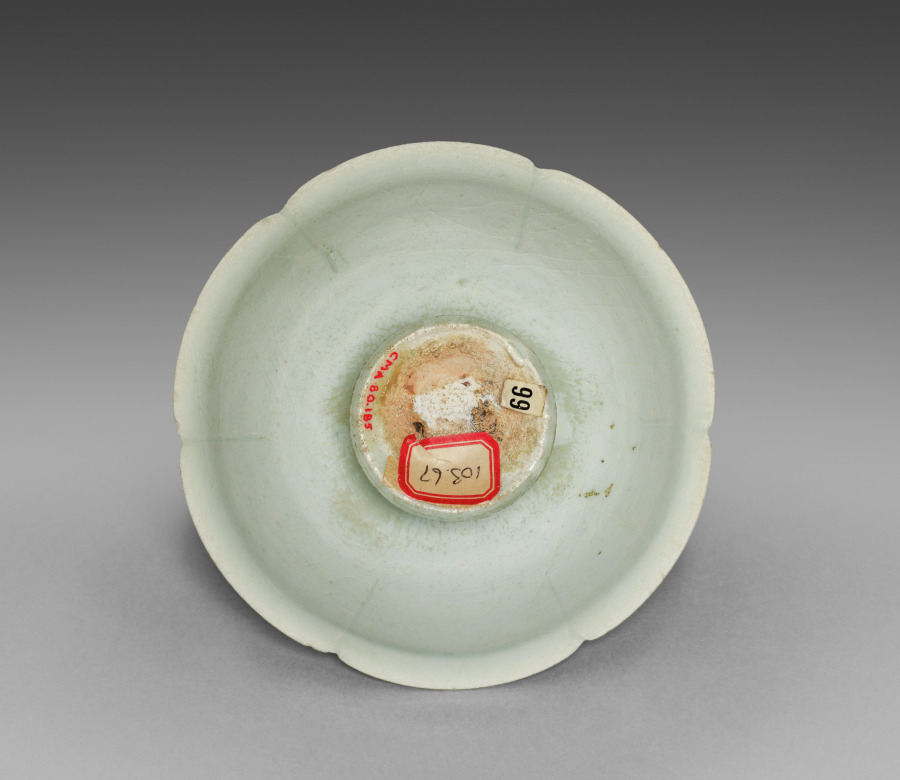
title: Cup and Stand (Cup)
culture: China, Jiangxi Province, Jingdezhen, Southern Song dynasty (1127–1279)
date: 1100s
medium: Porcelain with pale bluish-white glaze, qingbai ("blue-white") ware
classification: Ceramic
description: The kilns of Jingdezhen in Jiangxi province produced an extremely delicate porcelain made from the local resources of kaolin (white China clay) and petuntse (a feldspathic rock called china stone). It is glazed with a clear bluish-white glaze, thus the name qingbai (blue-white) or yingqing (shadowy blue) for this type of ware.